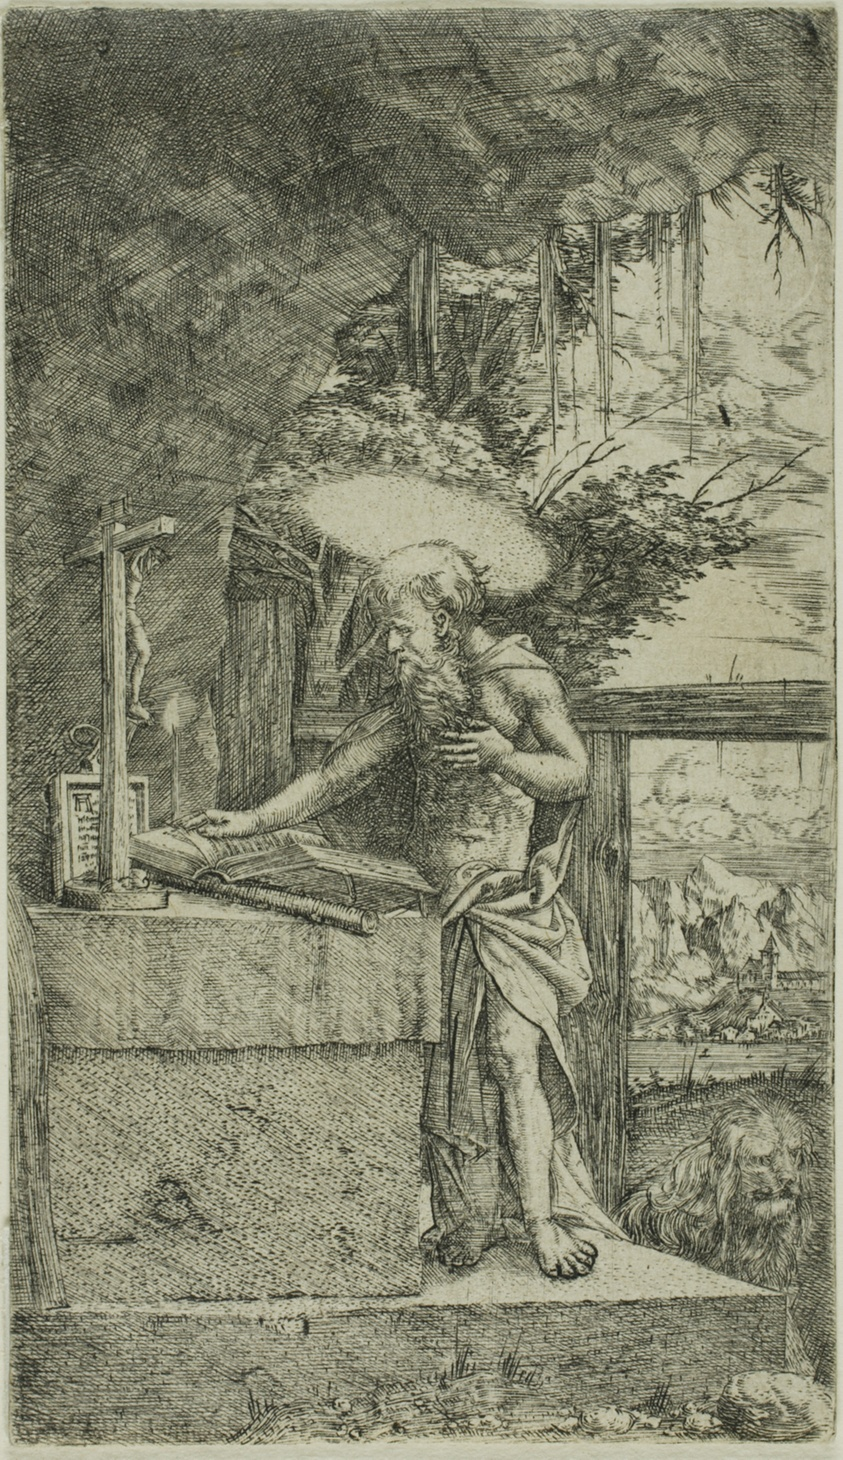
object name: Print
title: Saint Jerome Reading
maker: Albrecht Altdorfer (German, c.1480-1538)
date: 1500/1538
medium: Engraving in black on ivory laid paper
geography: Germany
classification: engraving; print; prints and drawing